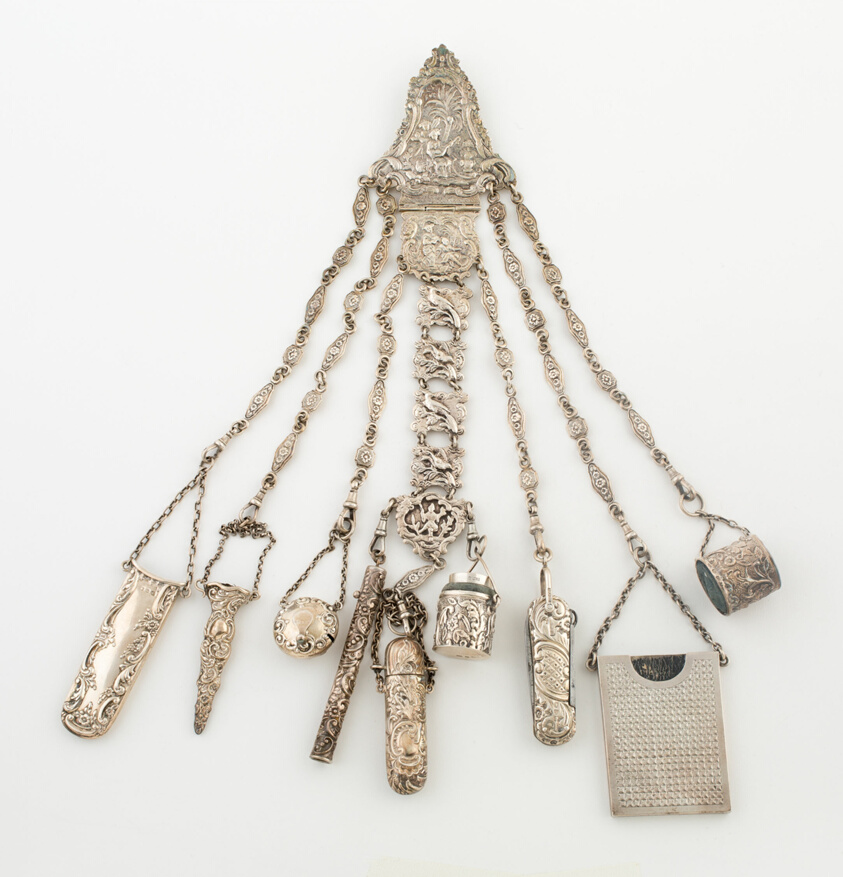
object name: Metalwork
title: Chatelaine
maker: London, England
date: 1861/99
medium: Silver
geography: London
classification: chatelaine; costume accessory worn at waist or below; costume accessory; european decorative arts; metalwork; silver; decorative object/ornament